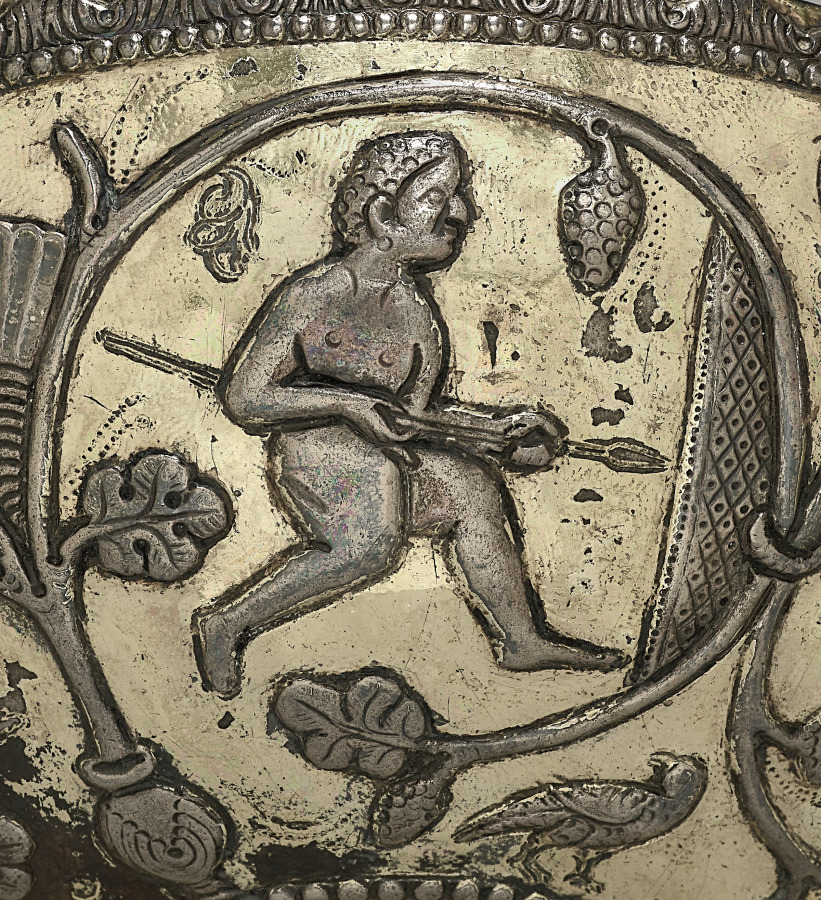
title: Bowl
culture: Iran, Sasanian Empire (224–651 CE)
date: 500–700 CE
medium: silver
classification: Metalwork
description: Every good Zoroastrian was supposed to spend one-third of his day farming; one-third philosophizing; and one-third eating, resting, and at pleasure. The abundance of Sasanian luxury goods is evidence of the importance accorded the last third of the day.